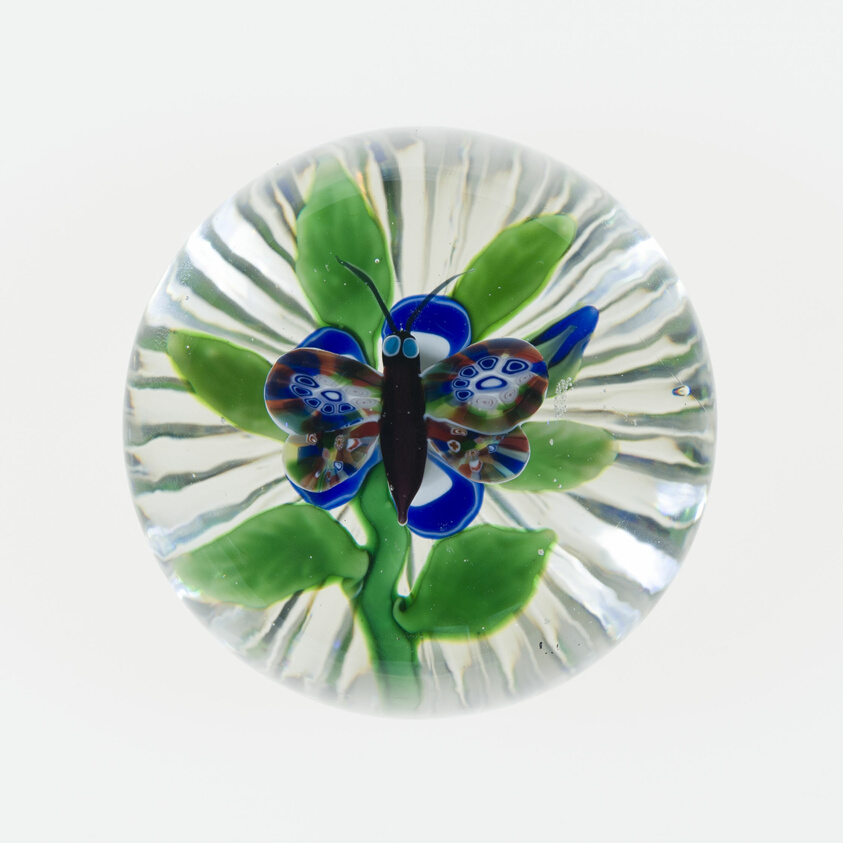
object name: Glass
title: Paperweight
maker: Baccarat Glassworks (Cristalleries de Baccarat); Lorraine, France, founded 1764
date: c. 1845–60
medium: Glass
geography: Baccarat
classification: paperweight; glass